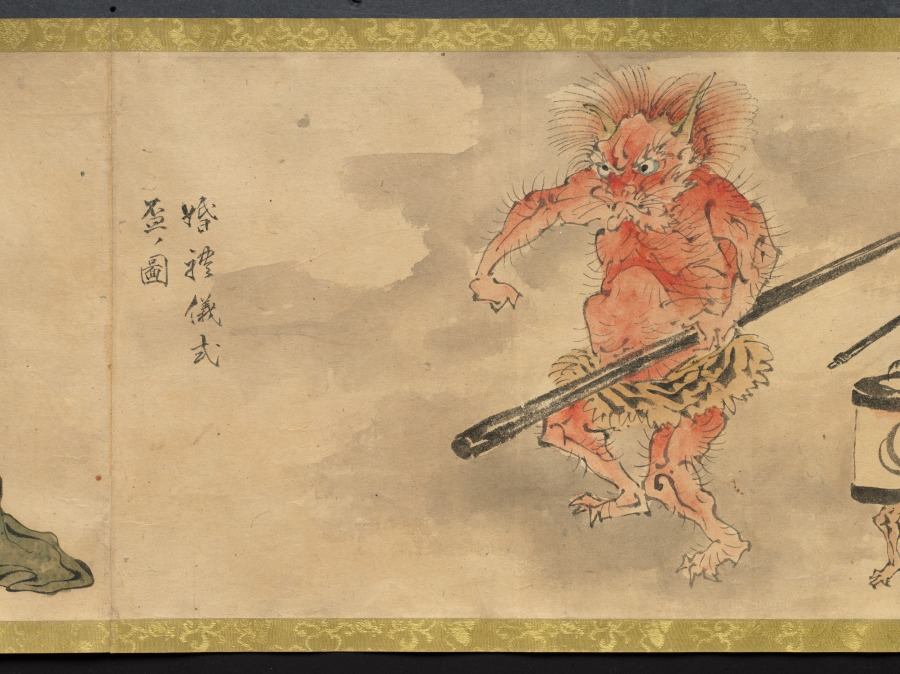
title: An Illustrated Marriage of Apparitions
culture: Japan, Edo period (1615–1868)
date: mid-1800s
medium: handscroll; ink and color on paper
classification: Painting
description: The matchmaking, engagement, wedding, and birth of the first child of two apparitions, or bakemono, literally "things that change," are illustrated in this whimsical, humorous handscroll. Japanese folklore abounds with such strange creatures, most famously represented in handscrolls featuring a procession of 100 supernatural monsters. Aside from a textual preface and cartouches indicating the content of the scenes, the tale is told visually. The artist and whereabouts of the original handscroll are unknown, but a number of other 19th-century copies by amateur painters exist in Japanese collections, attesting to its broad appeal.